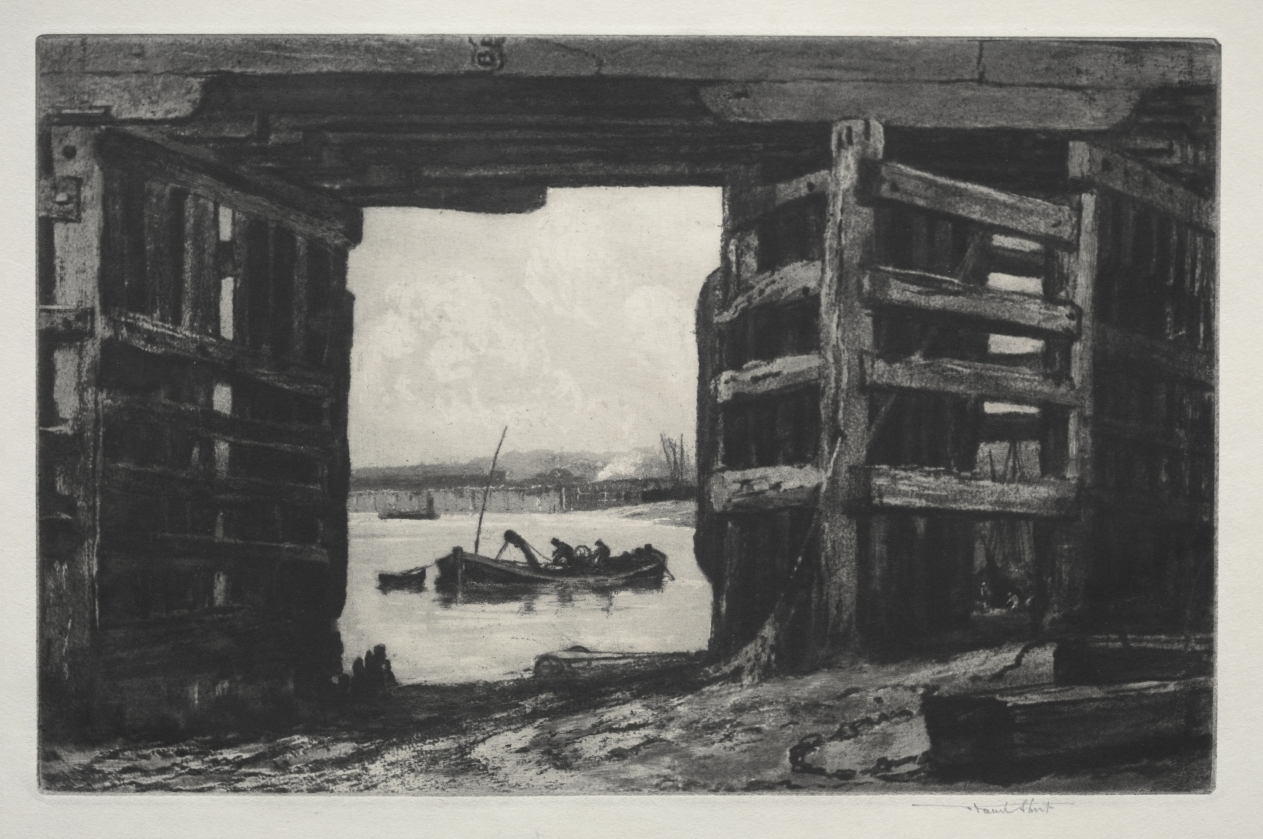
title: A Span of Old Battersea Bridge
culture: England, 19th-20th century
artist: Frank Short (British, 1857–1945)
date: 1899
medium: etching and aquatint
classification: Print